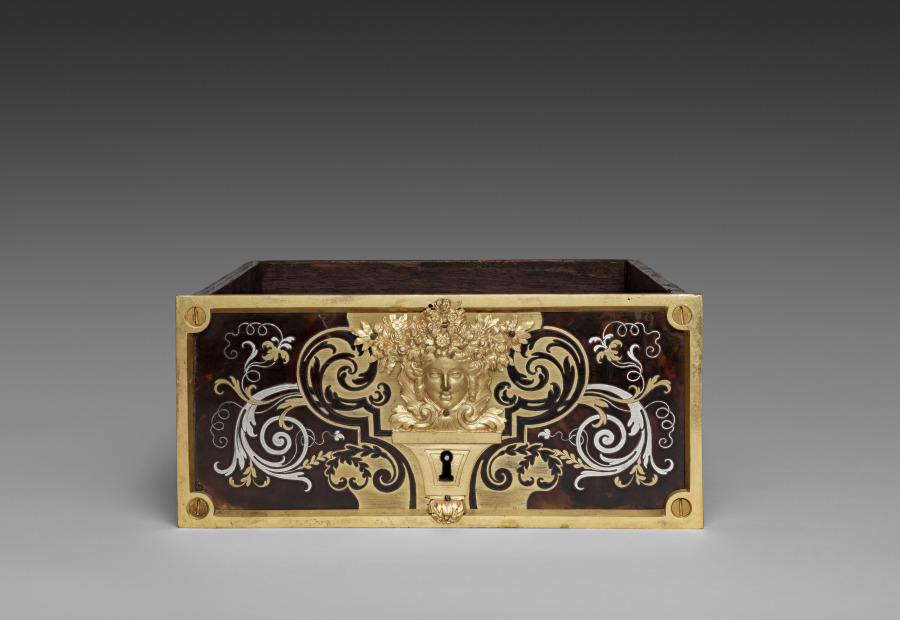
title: Side Drawer for Cabinet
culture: France, late 17th Century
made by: André-Charles Boulle (French, 1642–1732)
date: c. 1690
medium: ebony, marquetry in metal and tortoise shell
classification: Furniture and woodwork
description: Appointed cabinetmaker to King Louis XIV in 1672, André-Charles Boulle became a master of furniture making in France during the late 1600s until his death in 1732. Known primarily for his use of marquetry, in which metal patterns are inlaid into tortoiseshell then applied within the veneered surface of the furniture, Boulle established a level of quality and craftsmanship few others could achieve. As a result, his work found favor at the royal court and among other aristocrats and diplomats eager to impress the king. The inclusion of a medallion depicting Louis XIV within the bronze decoration of this chest would have identified the owner with the royal court. Often exhibiting stout architectural proportions with elegant groups of inlaid motifs such as the parrot on the central panel of this chest, Boulle’s designs are an example of the intellectual fashion for contrasting ideas, materials, and motifs.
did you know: Originally designed to sit atop an elaborate tall stand, this chest was likely altered in the late 1700s to reduce its scale and height.